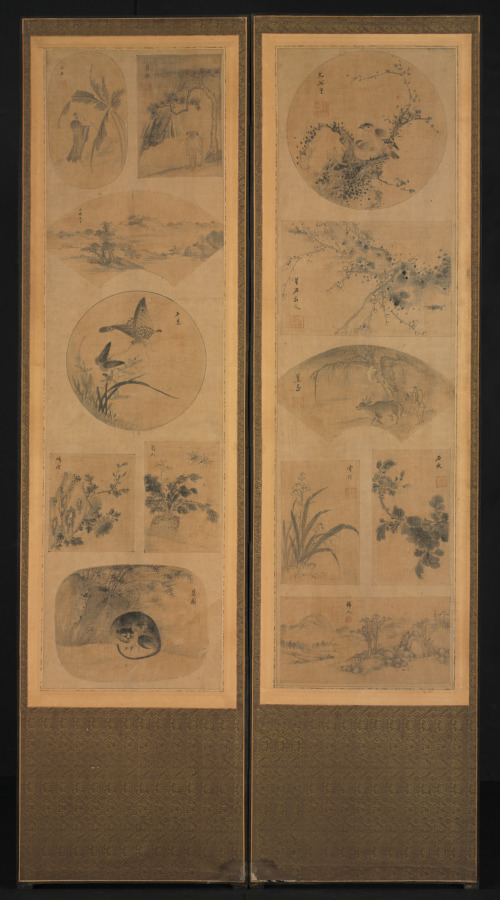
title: Painting of One Hundred Themes (obverse)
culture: Korea, Joseon dynasty (1392–1910)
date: late 1800s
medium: Ten-panel folding screen affixed with album leaves (obverse), calligraphy (reverse), ink and color on silk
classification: Painting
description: This screen depicts paintings on one side and poems on the other—an economical format often used in Korea to allow the viewer to enjoy both sides of one screen. The front features an assortment of bird-and-flower, landscape, and figural paintings executed according to the brush manner of more than 50 artists. A calligrapher has brushed several Chinese poems about the four seasons on the reverse side, among them "Composing in the Daytime of Summer" by Tang poet Liu Zongyuan (773–819) and "Composing when Spring Begins" by Song scholar Zhang Shi (1133–1180).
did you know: Depicting small images of various subjects became one of the most popular types of painting toward the end of the 19th century.